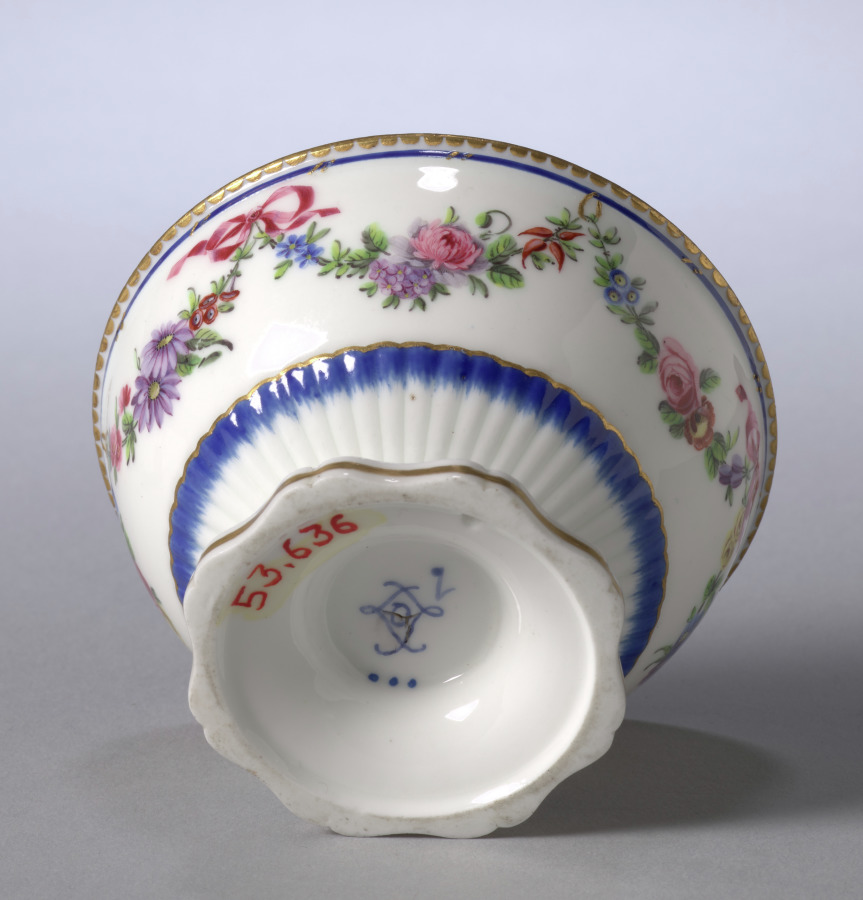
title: Sponge Box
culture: France, Sèvres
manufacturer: Sèvres Porcelain Factory (French, est. 1756)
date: c. 1769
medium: soft-paste porcelain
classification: Ceramic